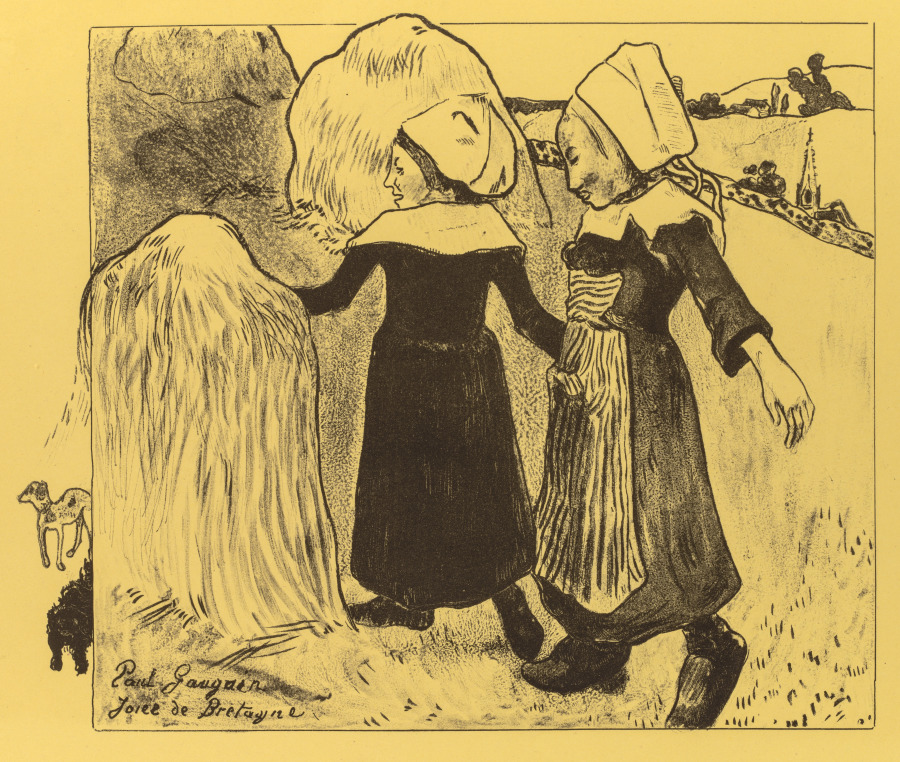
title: Volpini Suite: Joys of Brittany (Joies de Bretagne)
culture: France, 19th century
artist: Paul Gauguin (French, 1848–1903)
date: 1889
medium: zincograph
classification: Print